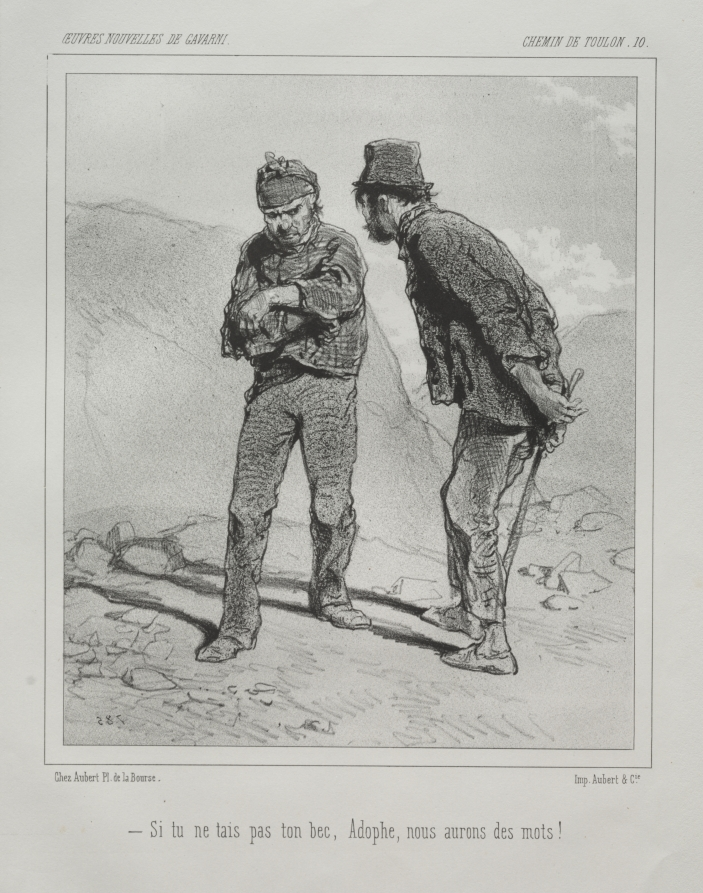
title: Chemin de Toulon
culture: France, 19th century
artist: Paul Gavarni (French, 1804–1866)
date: c. 1846–47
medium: lithograph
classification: Print